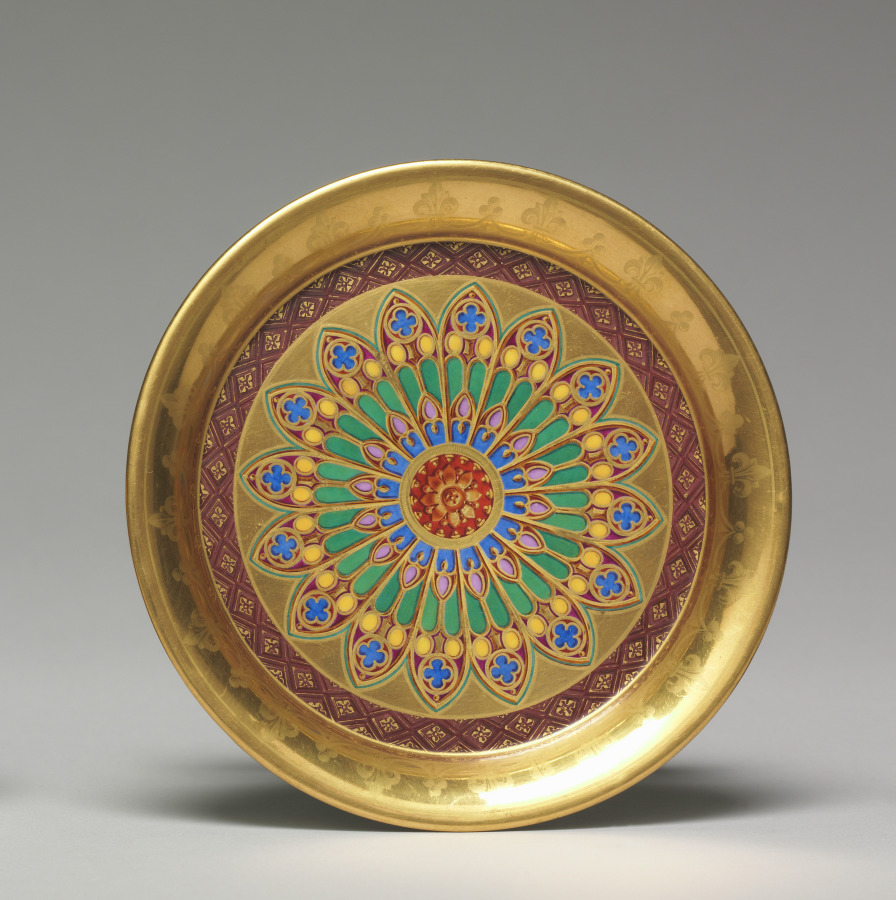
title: Saucer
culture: France, Sèvres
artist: Sèvres Porcelain Factory (French, est. 1756)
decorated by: Pierre Huard (French)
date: 1827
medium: porcelain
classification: Ceramic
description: The 19th-century decorator of this cup embellished it with motifs from different eras, including portrayals of three ancient Frankish or French kings, surrounded by later Gothic style decoration.